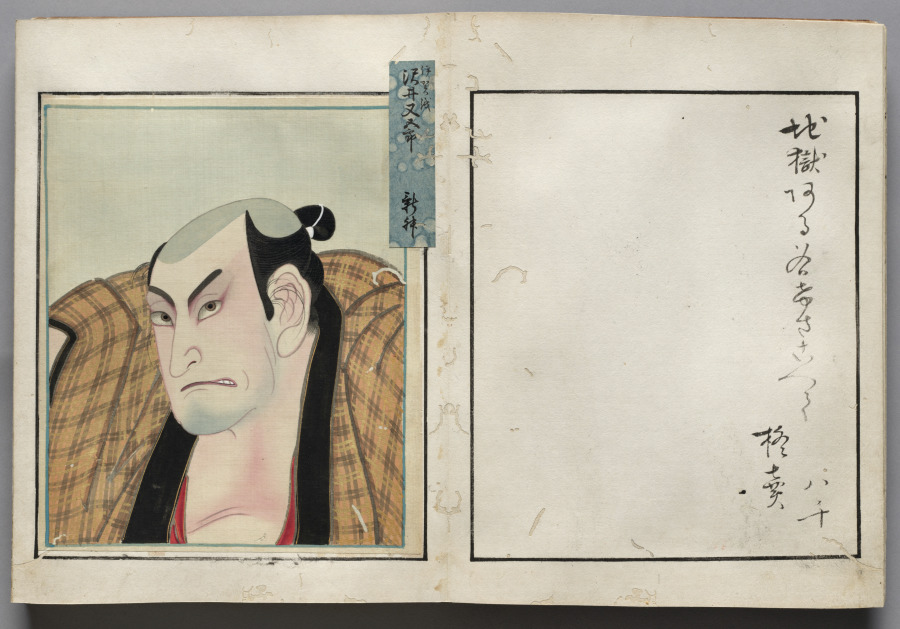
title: Double-Leaf from Album of Actor Portraits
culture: Japan, Edo period (1615–1868)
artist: Shōrakusai (Japanese)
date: c. 1790–1810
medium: double-leaf from an accordion-style album; ink on paper (right) and ink and color on silk (left)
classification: Bound Volume